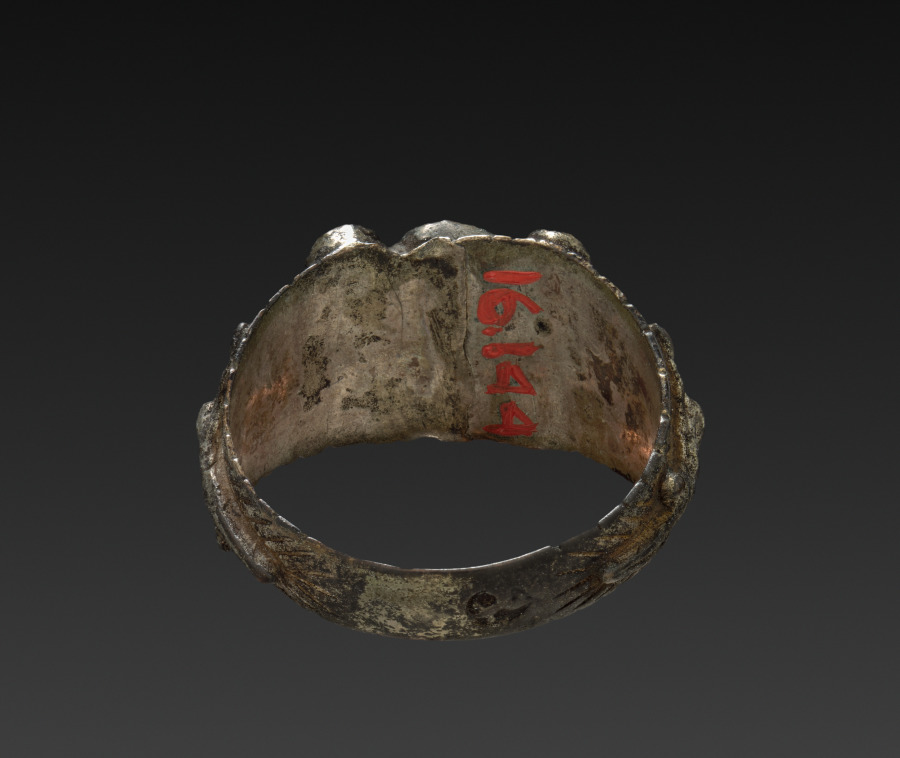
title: Peasant's Ring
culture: Germany, 18th-19th century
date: 1700s - 1800s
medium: silver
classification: Jewelry